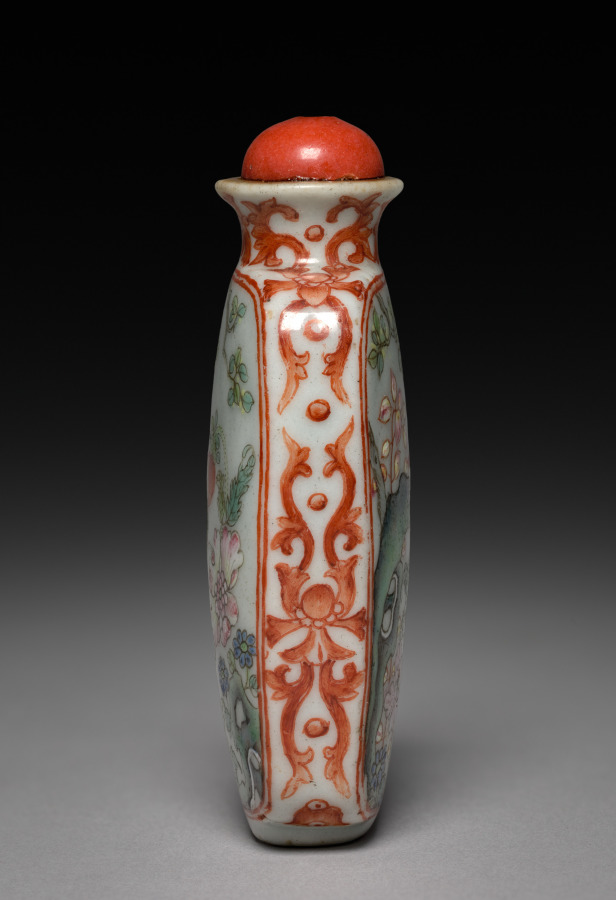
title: Snuff Bottle with Stopper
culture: China, Qing dynasty (1644–1911), Qianlong reign (1736–95)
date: 1736–95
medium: porcelain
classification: Ceramic